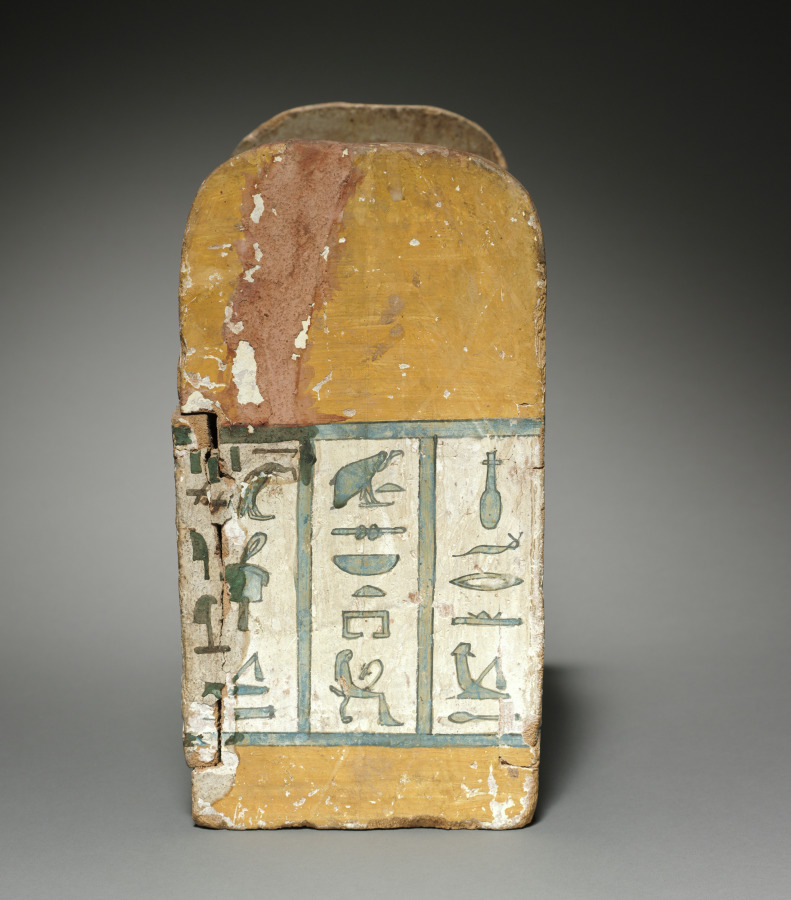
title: Covered Box for Shawabtys of Ditamenpaankh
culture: Egypt, Late period (715–332 BCE), Dynasty 25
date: 715–656 BCE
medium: painted wood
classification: Funerary Equipment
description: High demand for shawabtys in the Late Period, a time when as many as 400 or more shawabtys were placed in the tomb with the deceased, gave rise to a specialized container for storing them: the shawabty box. This example is inscribed for the lady of the house, Ditamenpaankh, and was probably one of a pair originally made for her. The single-masted boat on the box’s lid is perhaps an allusion to the pilgrimage of the deceased to the holy city of Abydos, the cult city of Osiris, king of the dead. The shawabtys inside are crude, mass-produced examples cast in an open mold. Made of terracotta, their blue paint imitates more costly shawabtys made of faience. As for the shawabty spell, it has been removed from its traditional location on the shawabty’s front and relocated onto the sides of box, where it needed only to be written once, thus expediting production.